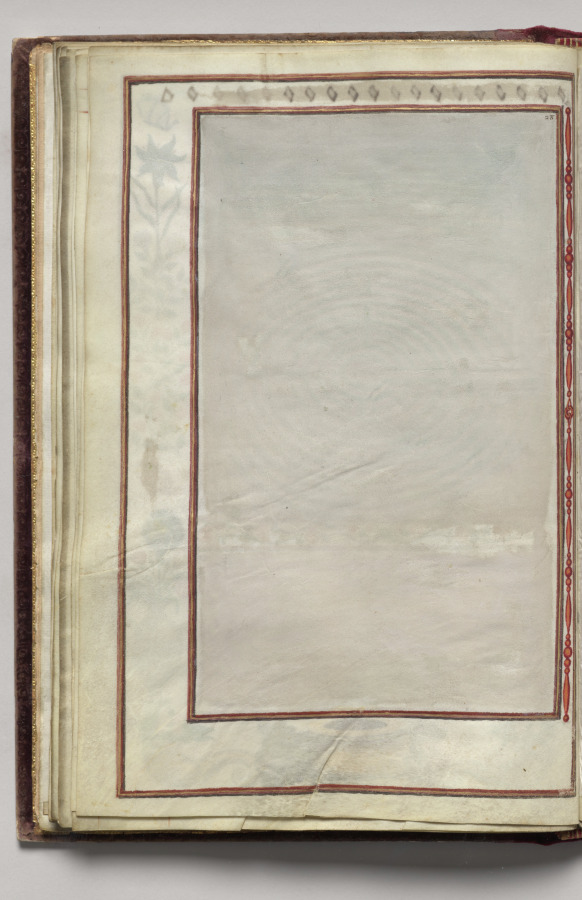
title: Border, folio 16 (verso), from Florilegium (A Book of Flower Studies)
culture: France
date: 1608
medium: watercolor, ink, silver and gold over occasional traces of pencil, on vellum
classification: Bound Volume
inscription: Dated: Poitiers 1608 (on frontispiece) Signed: On frontispiece in black ink, lower right: Van Kuyk Notation on drawing: Frontispiece: in pencil, lower margin: * élève de Van Kessel, peintre flammand (* in pencil also appears in front of Van Kuyk's name).